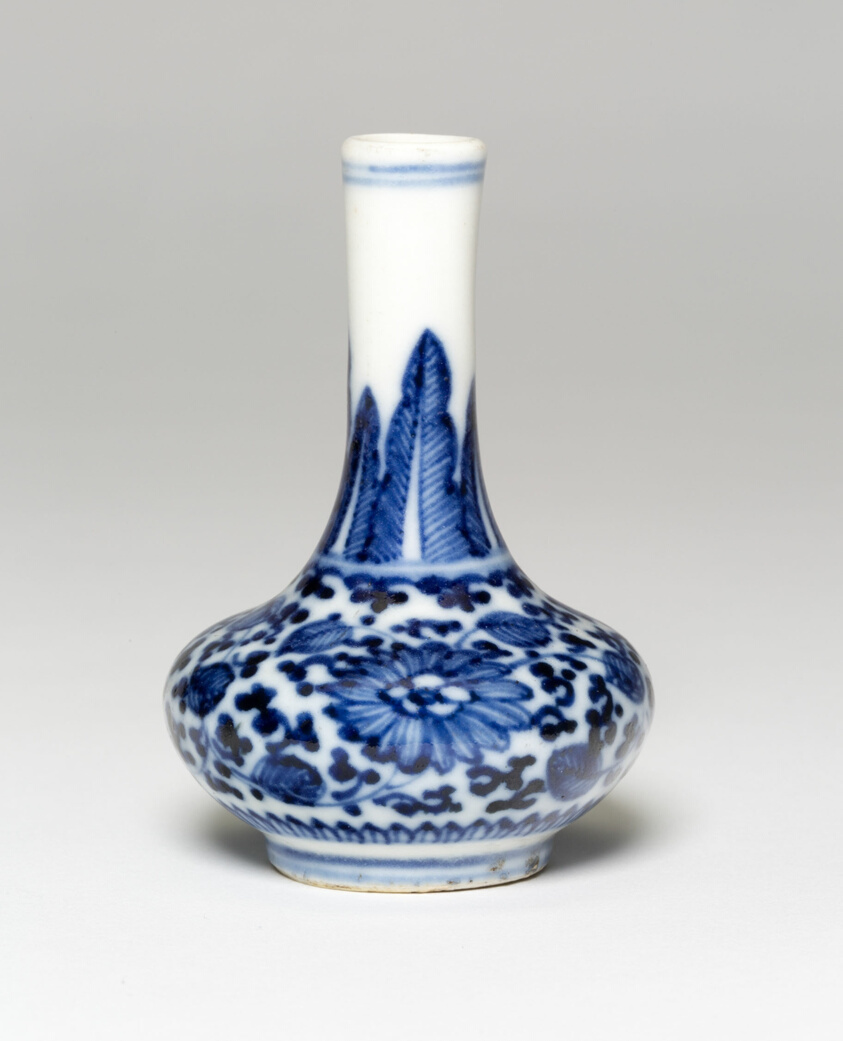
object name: Vessel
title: Vase with Chrysanthemum Flower Heads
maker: China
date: Qing dynasty (1644–1911), Yongzheng period (1723–1735)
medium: Porcelain painted in underglaze blue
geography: China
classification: porcelain; asian art; ceramics